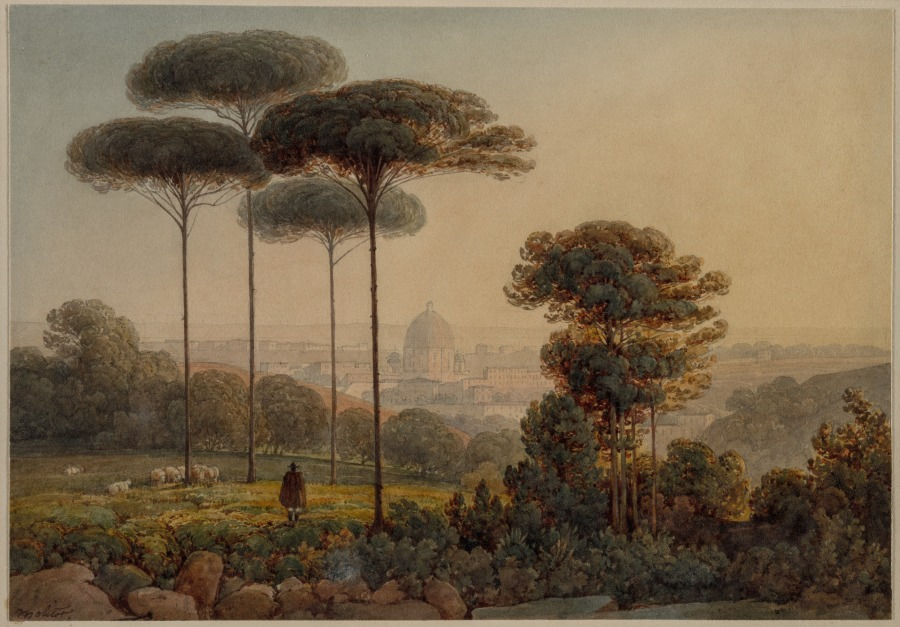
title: View of the Basilica of St. Peter from the West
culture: Austria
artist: Joseph Molitor (Austrian, after 1837)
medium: watercolor with traces of graphite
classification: Drawing